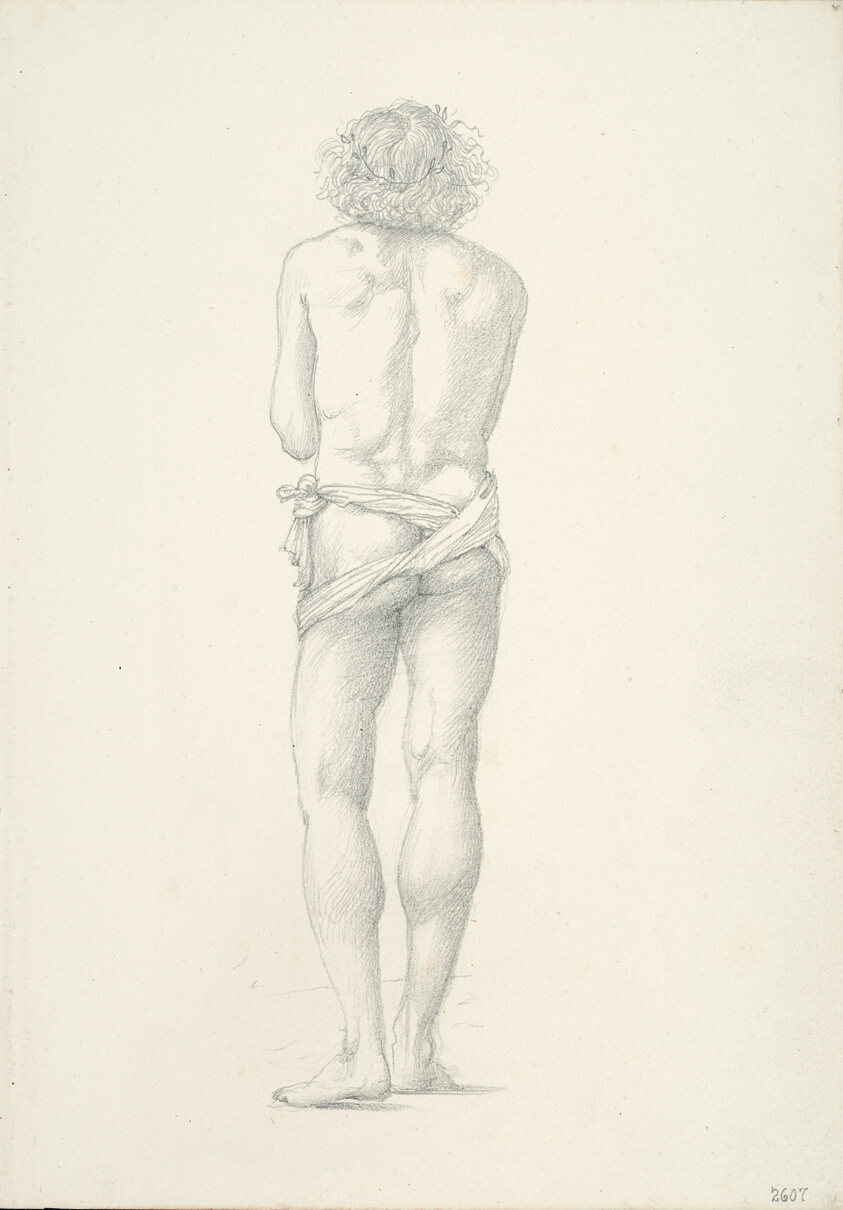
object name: Drawing and Watercolor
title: Back View of Standing Male Nude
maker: Sir Edward Burne-Jones (English, 1833-1898)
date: c. 1873–77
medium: Graphite on ivory wove paper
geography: England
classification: graphite; drawings (visual works); prints and drawing